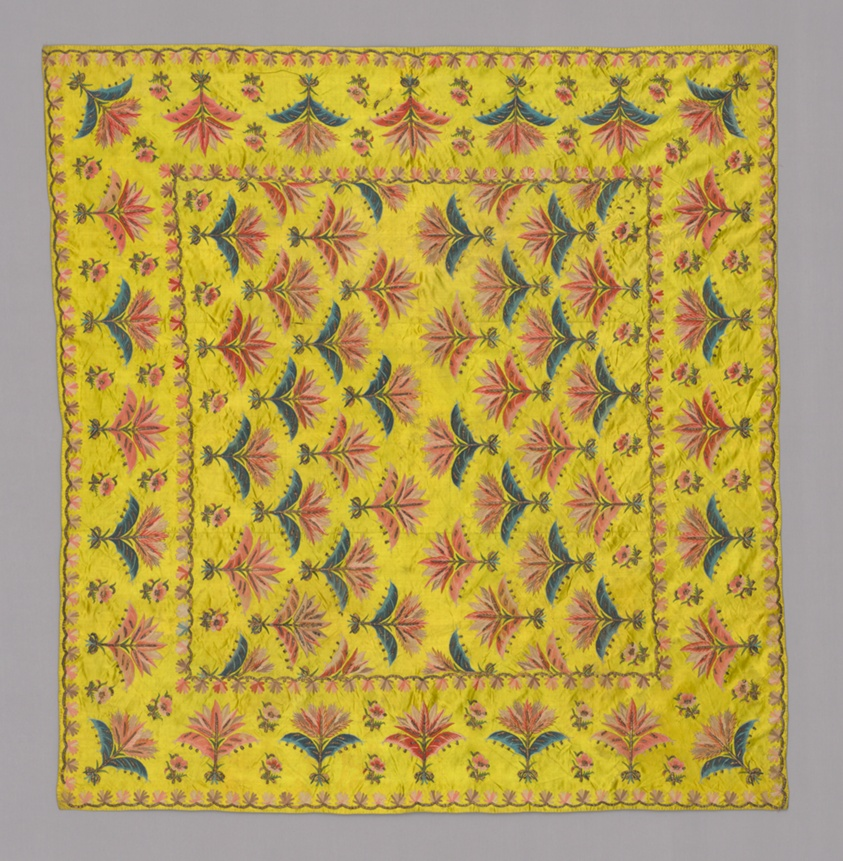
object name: Textile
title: Needlework Cover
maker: India or Turkey?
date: 19th century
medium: Embroidered on satin with silk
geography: India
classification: textile; weaving